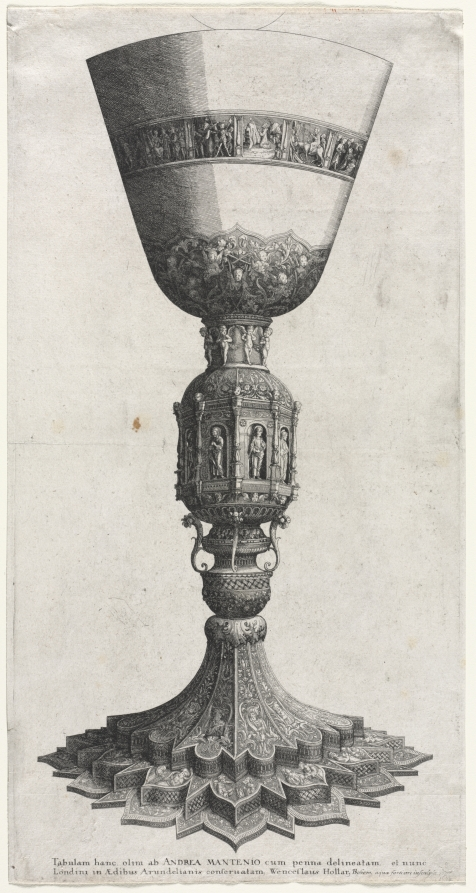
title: The Great Chalice Adorned with Figures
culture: Bohemia, 17th century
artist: Wenceslaus Hollar (Bohemian, 1607–1677)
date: 1640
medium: etching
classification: Print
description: Chalices traditionally hold the priest’s consecrated wine during Catholic Mass. Wenceslaus Hollar made this etching of an over-life-size chalice from a drawing in the collection of his patron, the English 14th Earl of Arundel. The elaborate decoration consists of scenes from the suffering and death of Christ, standing saints and apostles on the stem, and a pointed foot inspired by Moorish designs (a style prominent in Spain and North Africa featuring distinctive pointed arches). The barely discernable crescent shape just above the rim suggests a hovering Eucharistic wafer, representing the body of Christ.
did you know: Dating back to the Romanesque period, architectural niches populated by Christ's apostles—like those seen on the stem of this chalice—are a common feature on church facades.